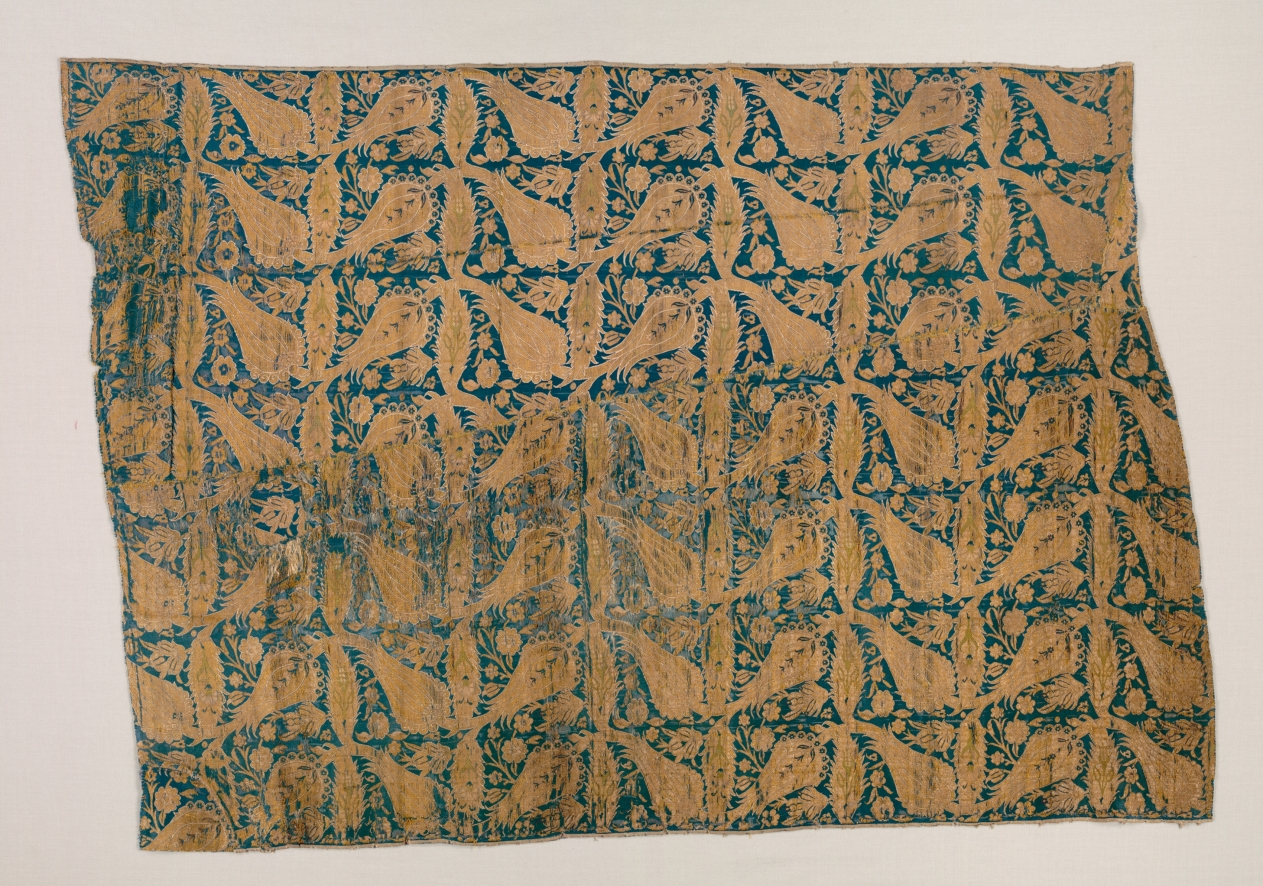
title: Lampas with compressed undulating vines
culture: Turkey, Bursa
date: early 1600s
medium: lampas: silk and gilt-metal thread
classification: Textile